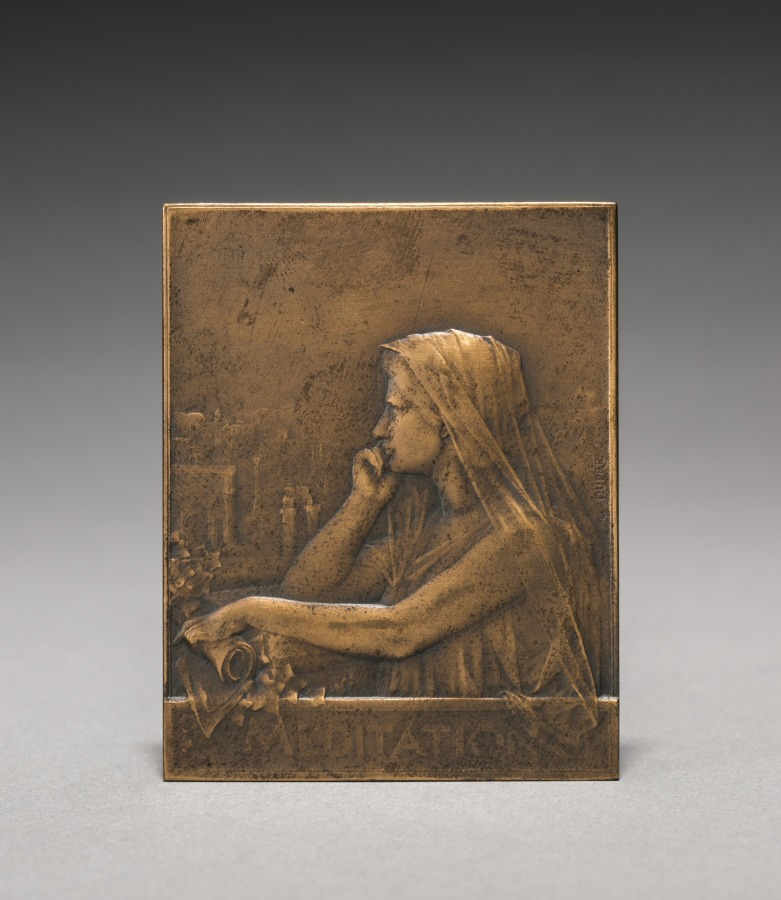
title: Medallion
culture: France, 19th-20th century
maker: Georges Dupré (French, 1869–1909)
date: c.1899–1903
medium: bronze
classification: Metalwork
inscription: "Meditation"; signed: "G. Dupré."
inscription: "La le lierre jaloux de l'immortalite triomphe en possedant ce que l'homme a quitte"